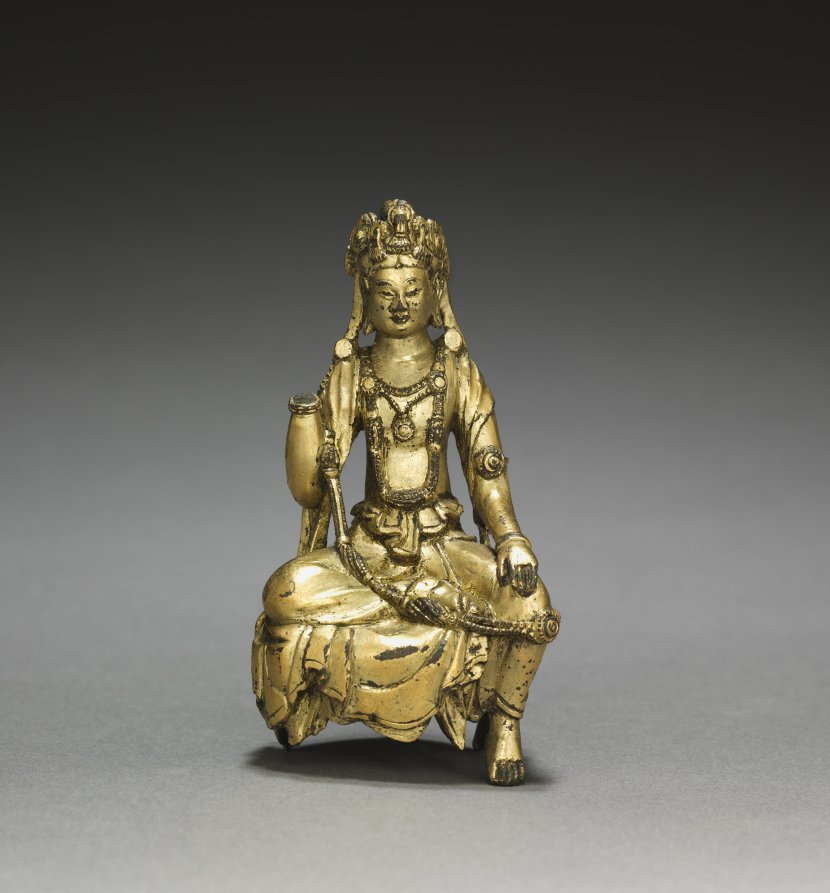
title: Bodhisattva Guanyin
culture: China, Sui dynasty (581-618)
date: 581–618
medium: gilt bronze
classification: Sculpture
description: Portable Buddhist figures and objects like this gilt bronze had a variety of uses. They could have been carried in religious processions. Others could serve as donations, souvenirs, or votive items in the context of pilgrimages to religious sites. Their miniature size also made them appropriate for placement on private altars or shrines for personal devotion.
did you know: Guanyin, the Bodhisattva of Compassion, is seated in the lalitasana pose, at royal ease with one leg tucked and one leg hanging down.